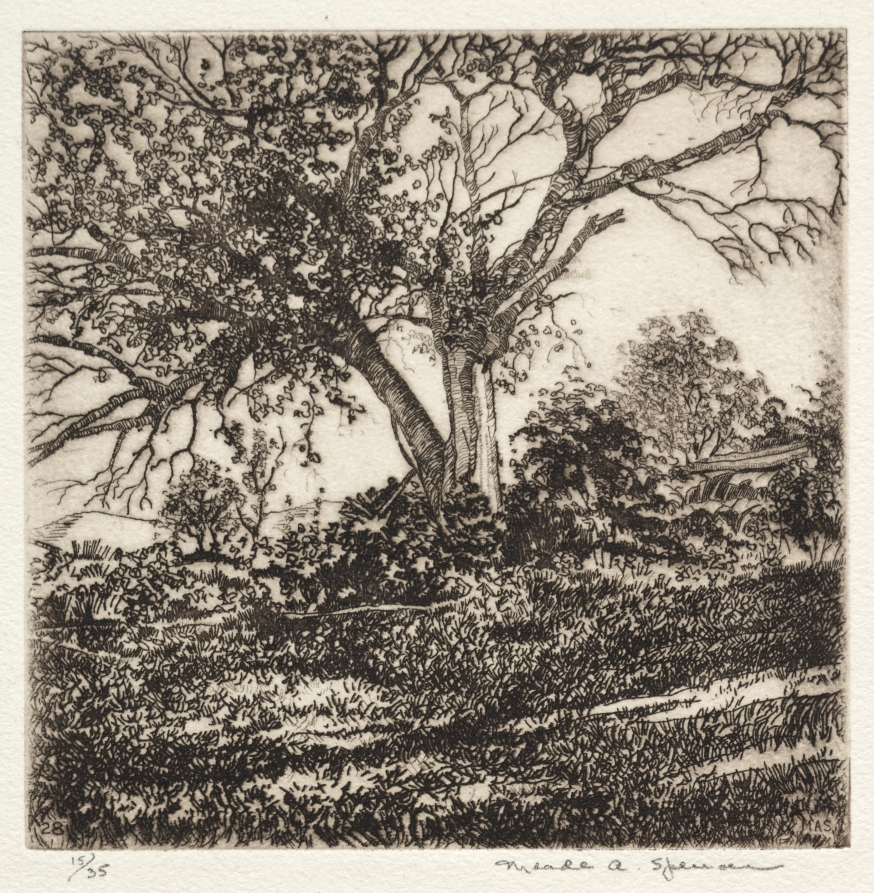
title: Apple Tree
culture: America, Ohio, Cleveland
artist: Meade Ashley Spencer (American, 1896–1956)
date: 1928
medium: etching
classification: Print